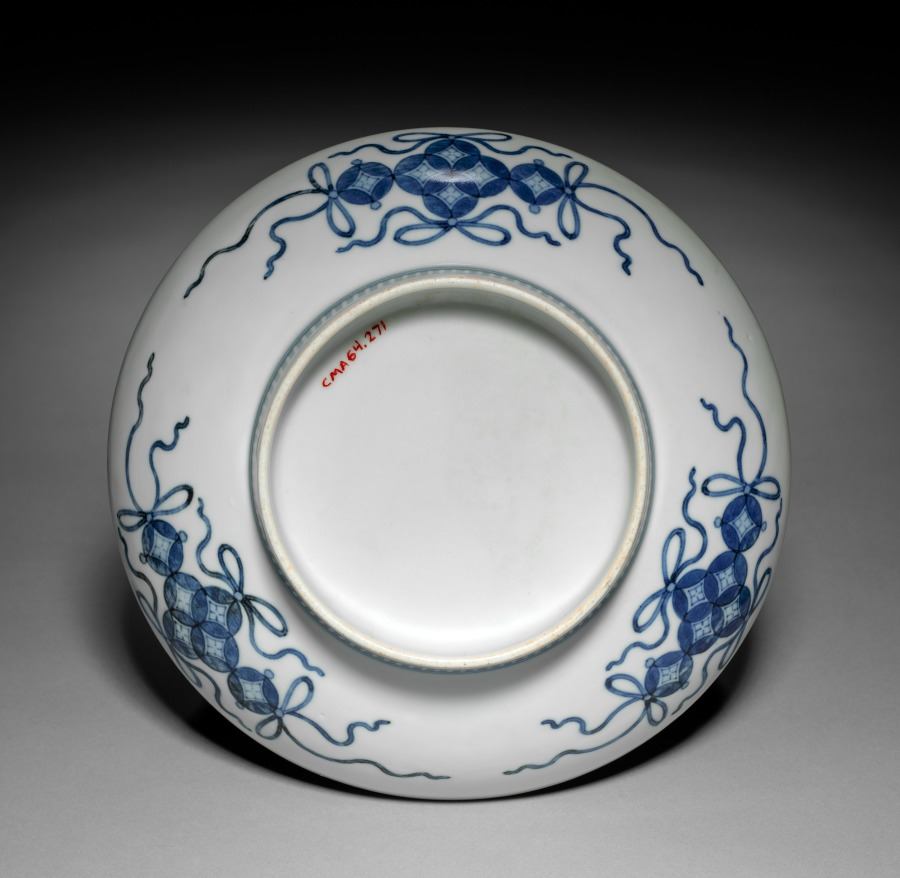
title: Dish with Reeds and Mist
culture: Japan, Edo period (1615–1868)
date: c. 1700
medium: Porcelain with underglaze blue and overglaze color enamel (Hizen ware, Nabeshima type)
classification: Ceramic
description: The interior of this dish features clusters of reeds emerging from mist. The gradation of blue wash in the background suggests that the scene is set by still waters, perhaps the banks of a river or edge of a marsh. The celadon, or pale green glaze, evocative of mist or fog, contrasts visually with the reeds and water.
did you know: Nabeshima dishes were produced in standard sizes of three, five, and seven sun (a traditional measurement of around 3 cm) in diameter.